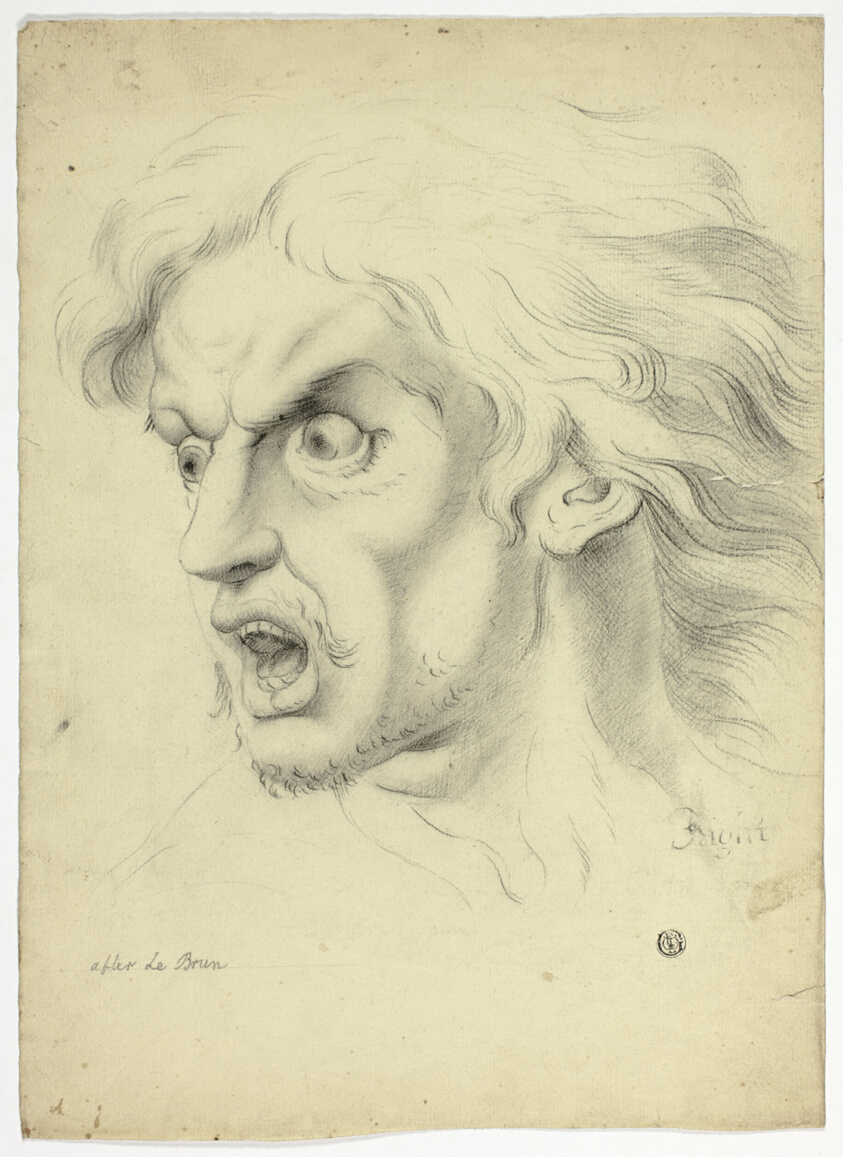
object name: Drawing and Watercolor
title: Fright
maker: John Downman (English, 1750-1824); or after Charles Le Brun (French, 1619-1690)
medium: Charcoal with stumping and traces of brush and black wash on cream laid paper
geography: England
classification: chalk; drawings (visual works); prints and drawing